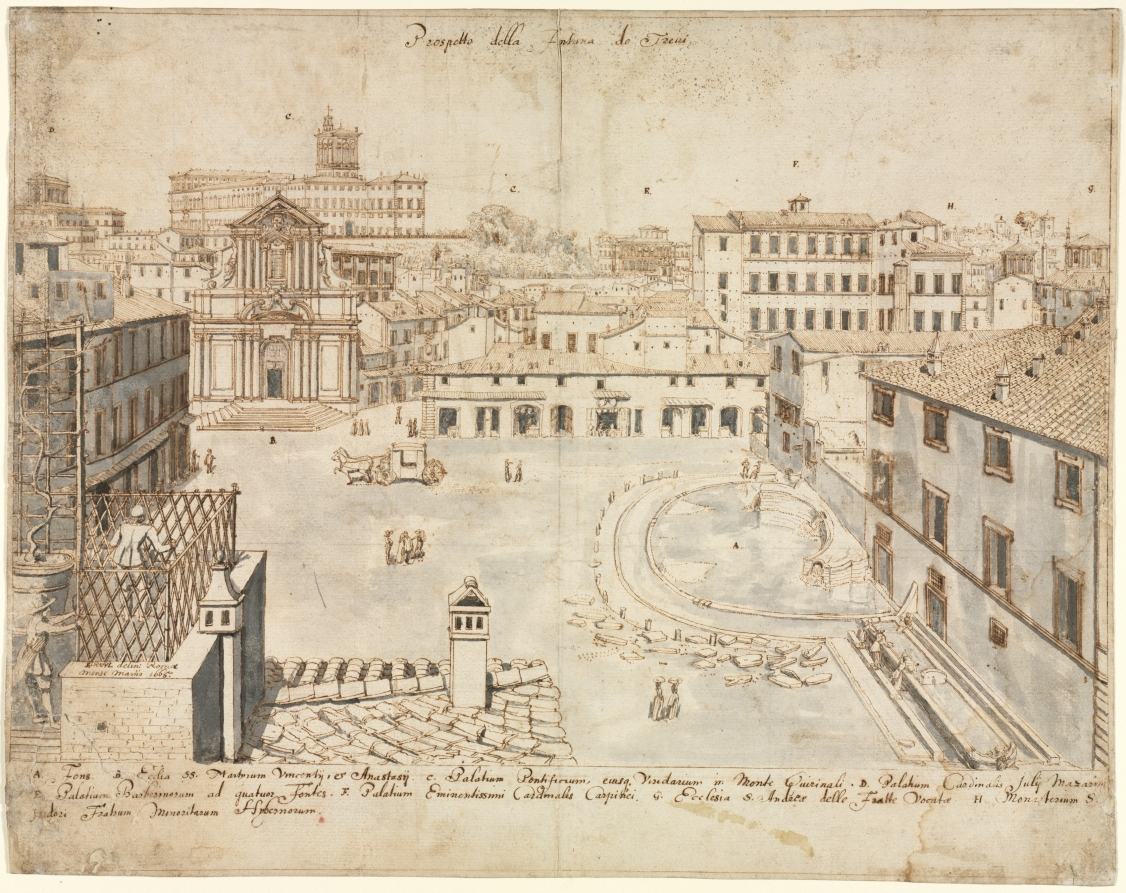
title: Eighteen Views of Rome: The Trevi Fountain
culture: Flanders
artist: Lievin Cruyl (Flemish, c. 1640-c. 1720)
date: 1665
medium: pen and brown ink and brush and gray wash over graphite; framing lines in brown ink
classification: Drawing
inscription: signed, lower left, in brown ink: [artist monogram: LC] RVYL delin: Romæ / mense martio 1665. ; by artist, upper center, in brown ink: Prospetto della Fontana de Trevi ; by artist, throughout composition, in brown ink: [the letters A-K] ; by artist, across bottom, in brown ink: A. Fons. B. Ecclia SS. Martyrium Vincentij, et Anastasij. C. Palatium Pontifiorum, eiusq. Viridarium in Mounte Quirinale. D. Palatium Cardinalis Julij Mazarini. / E. Palatium Barberiniorum ad quatuor Fontes. F. Palatium Eminentissimi Cardinalis Carpinei. G. Ecclesia S. Andreæ delle Fratte Vocatæ. H. Monasterium S. / I[si]dori Fratrum Minoritarum Hybernorum. ; ON PAPER STRIPS MOUNTED TO VERSO, lower left, in graphite: A20966 ; lower center, in graphite: E.19 ; ON PIECE OF PAPER APPLIED TO VERSO AS REPAIR, lower right, in brown ink: [illegible]